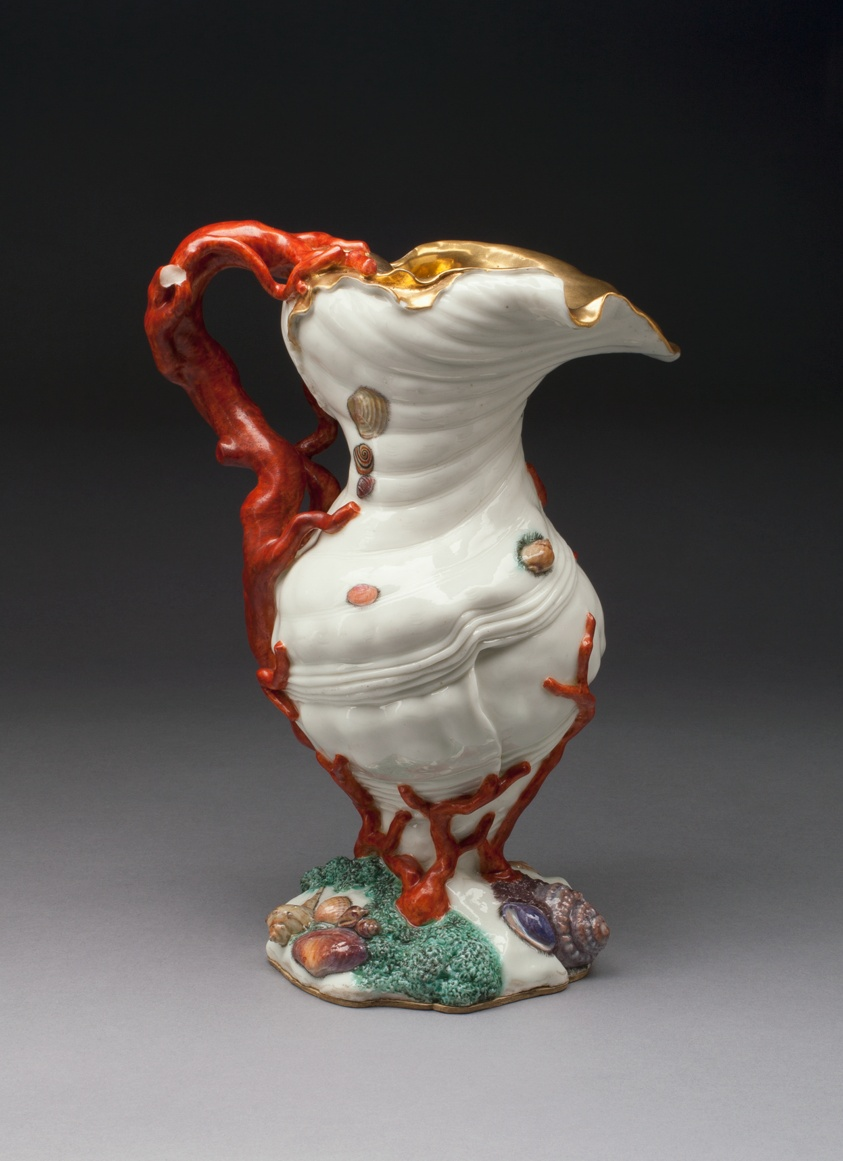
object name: Ceramics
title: Ewer and Basin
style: Rococo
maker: Capodimonte Porcelain Manufactory; Italian, founded 1743; Modeled by Giuseppe Gricci; Italian, c. 1700-1770; Naples, Italy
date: c. 1745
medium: Soft-paste porcelain, polychrome enamels and gilding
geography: Capodimonte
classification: ewer (vessel); porcelain; vessel; european decorative arts; ceramics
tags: seas, shells, coral